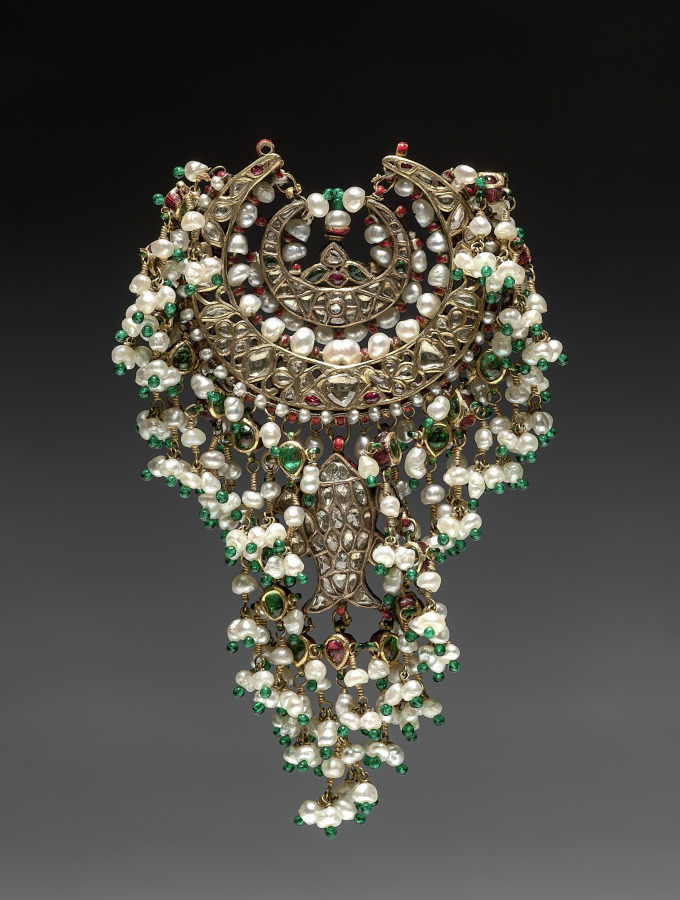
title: Pendant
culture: India, Delhi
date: 1800s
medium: Gilt silver with diamonds, emeralds, rubies, pearls, and enamel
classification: Jewelry